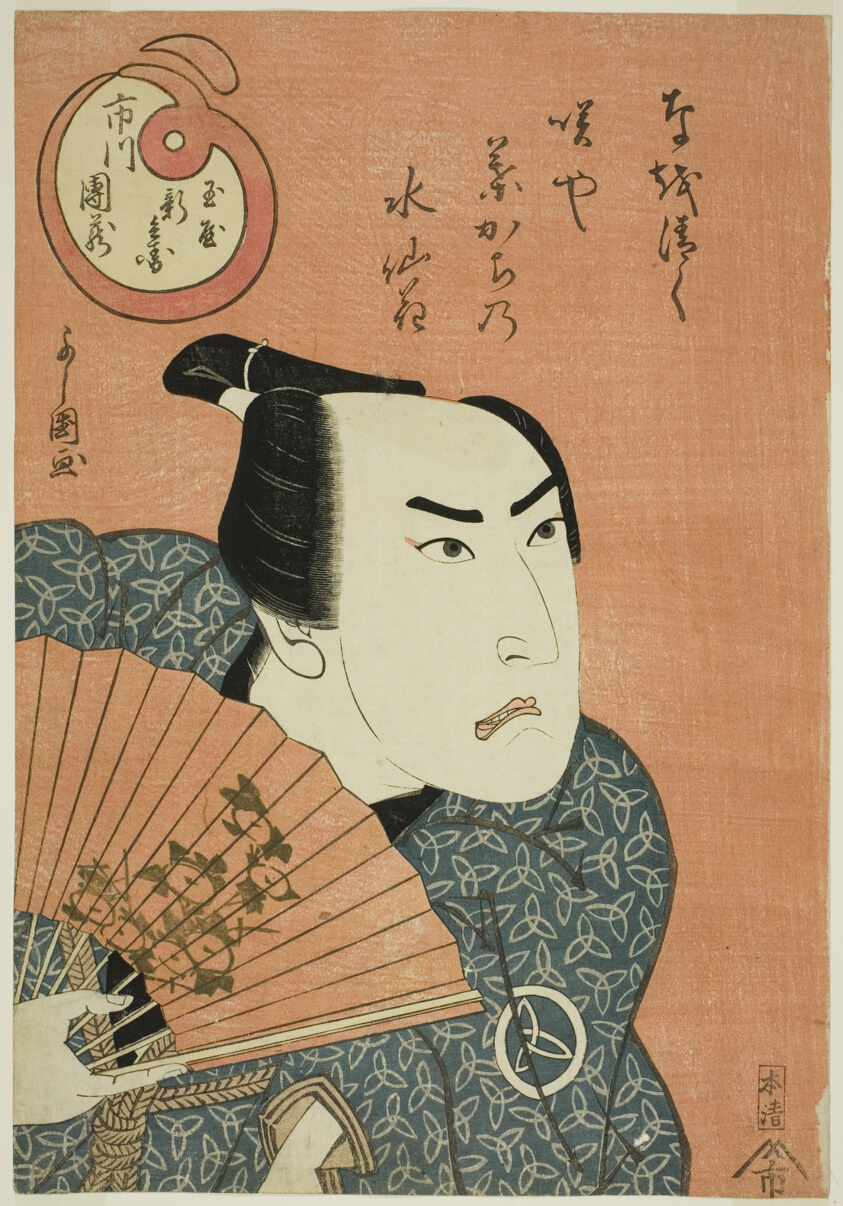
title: Portrait of the actor Ichikawa Danzo V as Tamaya Shinbei in the play "Sato-gayoi Tosei Sugata" (The Latest Fashion, to Frequent a House of Ill-Fame)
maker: Toyokowa Yoshikuni (Japanese, active 19th century)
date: c. 1830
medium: Color woodblock print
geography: Japan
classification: woodblock print; print; asian art